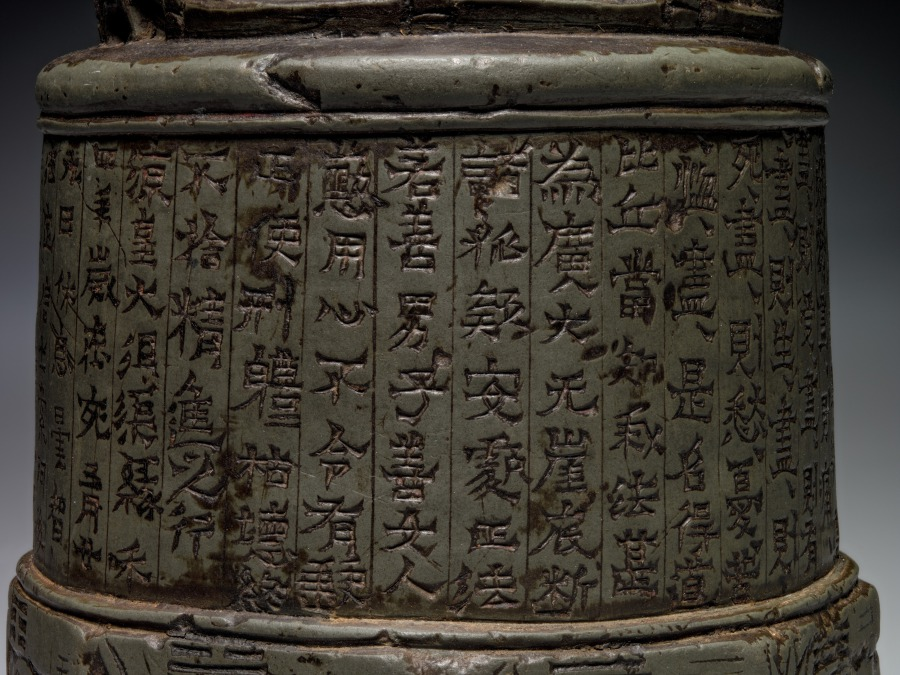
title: Miniature Votive Stupa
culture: China, Gansu province, Northern Wei dynasty (386-534)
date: 435 CE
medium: steatite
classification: Sculpture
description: This sutra pillar, inscribed with a sacred Buddhist text, belongs to a group of miniature stupas (jingta) that were found exclusively in the Gansu corridor, Northwest China. Ranging in date between AD 426–36, some of them bear the names of the lay Buddhist donors who commissioned them. A stupa is an architectural round structure built for the veneration of Buddhist relics. Miniature stupas may have commemorated the visit of a sacred site or represented donations to religious communities and sites.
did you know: There are trigrams, three horizontal lines, broken or continuous, above each of the eight bodhisattvas in the stupa's lower section.